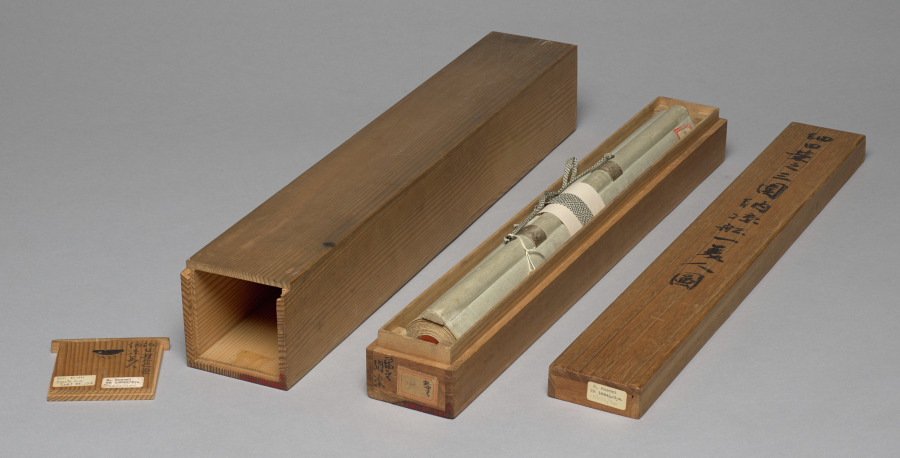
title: Beauty in a Boat on Sumida River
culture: Japan, Edo period (1615–1868)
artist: Chōbunsai Eishi (Japanese, 1756–1829)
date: c. 1801–4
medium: hanging scroll; ink and color on silk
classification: Painting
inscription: artist's signature 栄之筆 and seal, lower right.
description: The Sumida River was a popular refuge from the heat and humidity of the city during the summer. One can see the torii gate of Mimeguri Shrine just to the left of the woman's fan.